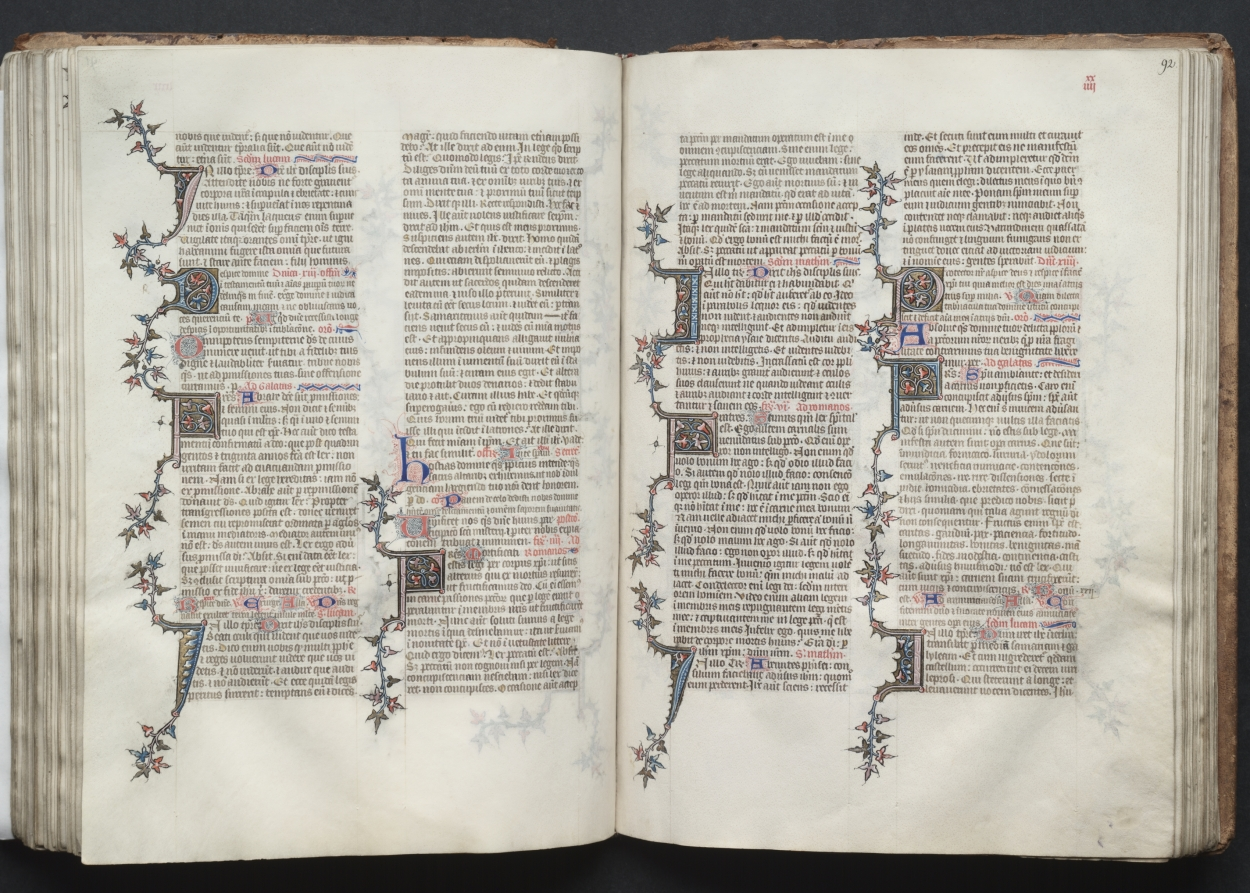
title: The Gotha Missal: Fol. 92r, Text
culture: France, Paris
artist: Master of the Boqueteaux (French)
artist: and Workshop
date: c. 1375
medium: ink, tempera, and gold on vellum; blind-tooled leather binding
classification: Bound Volume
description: The style and quality of this manuscript's decoration is typical of deluxe Parisian books made for aristocratic or royal patrons. Most of the book's decoration appears to be the work of the Master of the Boqueteaux, an artist active at the court of King Charles V (died 1380). His style was apparently shared by a number of book illuminators working in and around Paris. It is very possible that the Gotha Missal belonged to Charles V, but is not provable because the manuscript has no royal portraits and lacks a colophon. Given the book's magnificent decoration, however, it would seem that it was produced for a Valois prince, if not for the king himself. The manuscript receives its name from the German dukes of Gotha, its later owners.